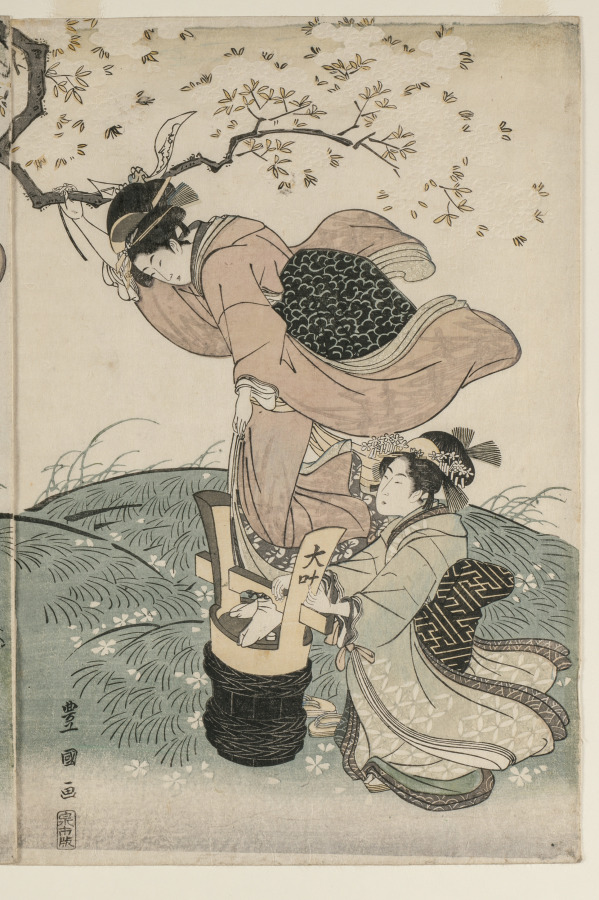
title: Cherry Blossoms in the Wind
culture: Japan, Edo period (1615–1868)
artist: Utagawa Toyokuni (Japanese, 1769–1825)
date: late 1790s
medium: woodblock print, ink and color on paper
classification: Print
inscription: Artist's signature: Toyokuni ga. Publisher: Izumiya Ichibei (Senichi han).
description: Highly regarded for his images of actors, Toyokuni was also known for his prints of beauties that demonstrate his brilliant skill in composition. This triptych depicts a joyful hanami (flower viewing) scene in spring. One woman stands on a huge wine bottle, while another one sits on a samurai’s shoulder; in both scenes, the women are tying prayers or poems on tree branches. On the left, two servants protect a well-dressed lady from the wind. Their fluttering, long-sleeved kimonos capture the wind’s movement. Standing in a triad, the three groups form a stable, harmonic composition against the cherry blossom background.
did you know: There is embossing on the flowers.